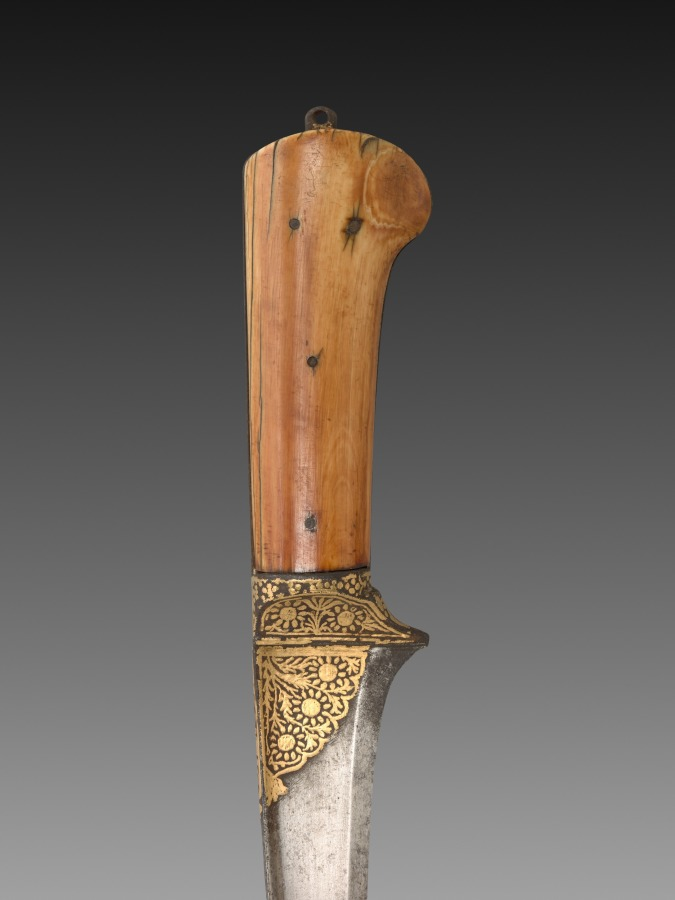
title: Dagger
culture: India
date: 1700s–1800s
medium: silver inlay and leather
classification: Arms and Armor